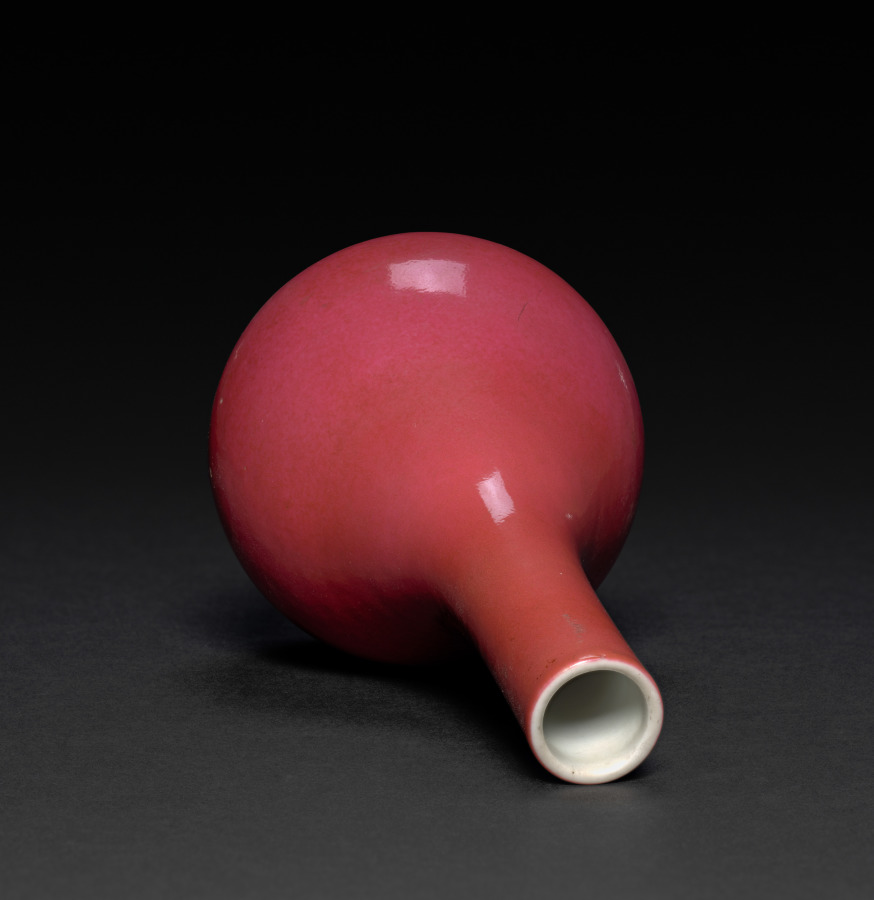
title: Vase with Pear-Shaped Body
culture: China, Qing dynasty (1644-1911)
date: 1644–1911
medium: porcelain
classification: Ceramic